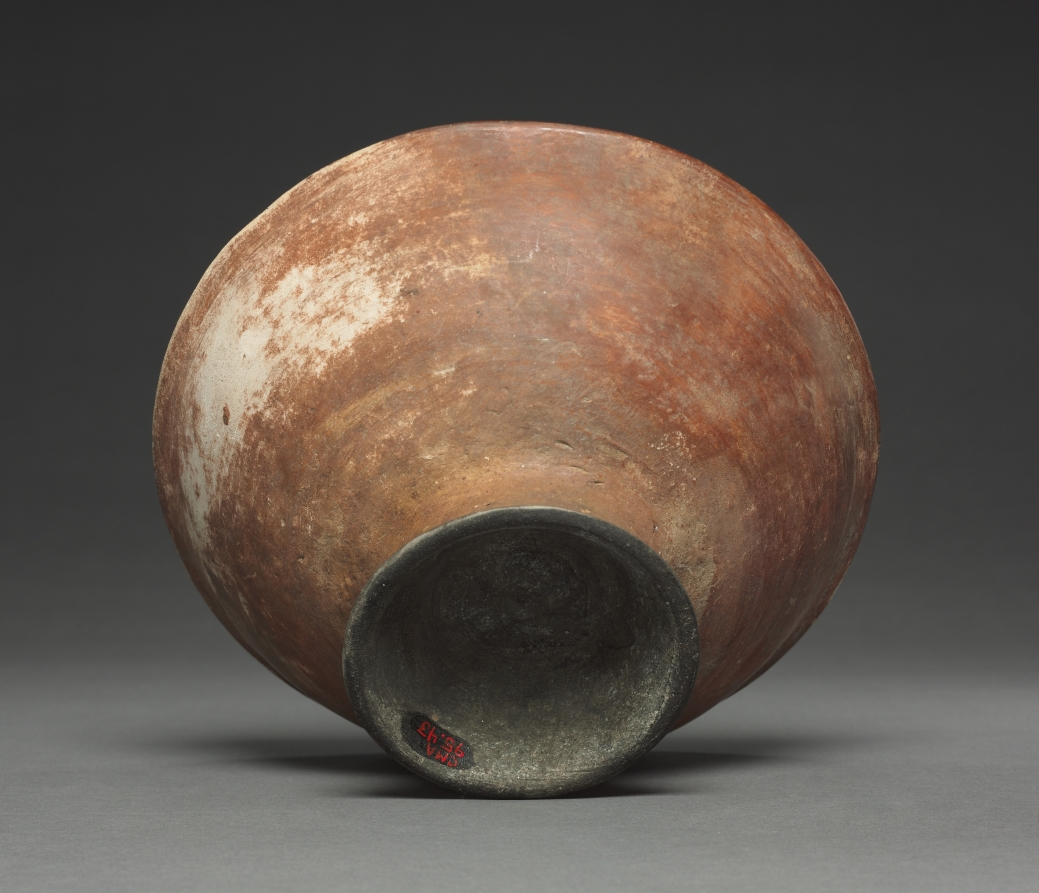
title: Bowl with Procession and Houses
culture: Colombia, Highland Nariño region,Tuza style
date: 1250–1550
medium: ceramic, slip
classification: Ceramic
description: In the Nariño region of southwestern Colombia, the dead were buried in shaft tombs, the most elaborate up to sixty feet deep and furnished with offerings such as these bowls. Colombian ceramics are not much studied and little can be said about their imagery, which reveals a keen interest in geometric abstraction. Depicted here are a row of figures with thatch-roofed huts, humans attacked by birds, and spiders.